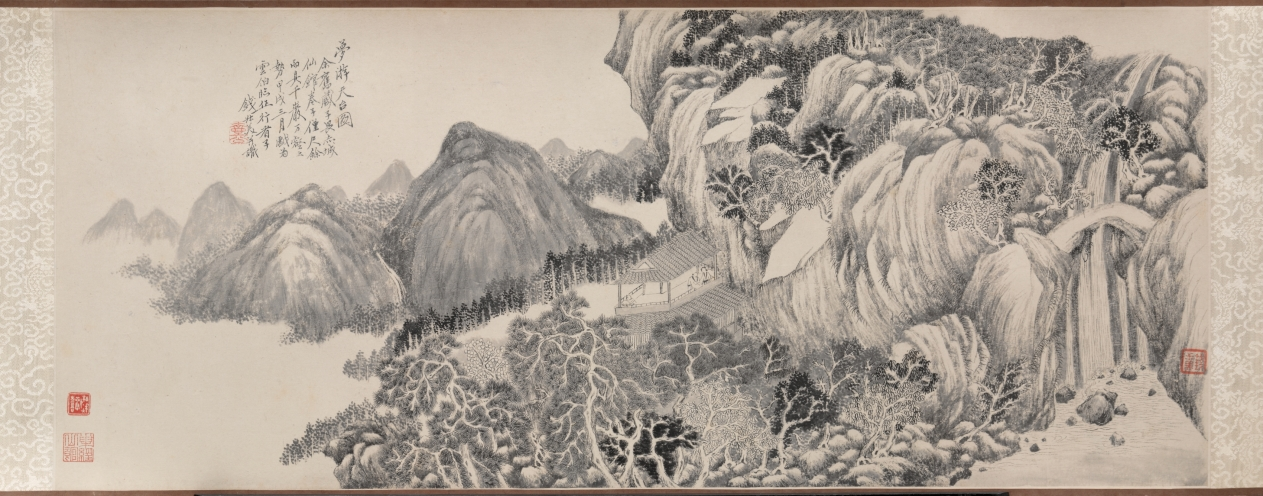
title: Dream Journey to Mt. Tiantai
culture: China, Qing dynasty (1644-1911), Jiaqing reign (1796-1820)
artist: Qian Du (Chinese, 1763–1844)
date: 1814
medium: handscroll; ink on paper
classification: Painting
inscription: 夢游天台圖. 余舊藏子畏赤城仙館卷子，僅尺餘而具千巖萬壑之勢。甲戌三月，戲為雲伯臨作行看子。錢叔美并識。[印]壺公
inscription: 今年春為雲伯作夢游天台圖，雲伯裝淇成卷。秋七月，余來吳中桂葉書堂，展玩竟日後，為其書紀舊作於卷後。雲伯詩空靈出杳，恐斯圖不能傳寫萬一。時秋暑熾甚，揮汗為之，腕力復弱，書又劣於畫，夫奈何。叔美并記。[印]叔美 [印, 右下]錢叔美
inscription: 屏風九疊雲錦張，山氣滃雲雲氣涼。/ 莓苔如席二尺厚，此間翠壁非石梁。/ 珠簾倒挂絕壁下，萬斛鮫珠向空瀉。/ 仙穴元氣沖然通，別有白龍出山罅。/ 龍起欲裂青山青，拍手一喝停雲停。/ 須臾復迸勢更急，水花倒捲搖瓏玲。/ 有美一人美且頎，翠袖獨倚紅闌西。/ 顧我目成若相識，疑是劉阮所遇之仙妃。/ 瓊臺金闕渺何處，胡麻飯熟桃花肥。/ 一翁飲水惟讀書，吐納山綠餐松腴。/ 書中所言不盡識，妙理必有壺公壺。/ 山花襲人紅蔌蔌，醒後翻疑尋夢轂。/ 泠然殘響滿空山，月痕正照秋屏綠。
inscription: 3 additional seals unidentified.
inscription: Titleslip by Mo Beiming 莫北溟 (active early 20th century)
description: When he painted Mt. Tiantai 天台山, Qian Du was a mature artist with a distinctive style that balanced refinement and “studied awkwardness.” He included the site’s famed features: the crescent-shaped stone bridge arching across the waterfall and surrounded by dense cliffs. Rows of pine and other vegetation appear in the crevices above and below the mountain. The twisting trunks and branches are left in outline, encased within the variegated foliage. In a pavilion at the center, a man and a woman look back to the lower right, across the ravine and toward the cascading water. Beyond and to the left, two simple mounds are backed by hills that stretch into the distance. Qian Du left space above the hills for an inscription describing the circumstances that gave rise to the painting. Chen Wenshu, family friend and patron to Qian Du, had dreamt of a journey to Tiantai, a mountain famed for both its natural beauty and its associations with legends and myths. This short handscroll was based on Chen’s description of his dream journey, on which he marveled at the scenery and encountered a goddess. Six months after the painting’s completion, Qian transcribed his friend’s longer poetic reminiscence on paper mounted after the painting. The landscape of the painting was not based on the physical site, which likely neither man had visited in 1814, but rather on the mythic tradition of Tiantai. It caused turbulence in the mind of the poet and provided inspiration to the painter.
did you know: The man and woman in the pavilion likely represent Chen Wenshu and the mysterious presence he encountered on his dream journey to Mt. Tiantai.